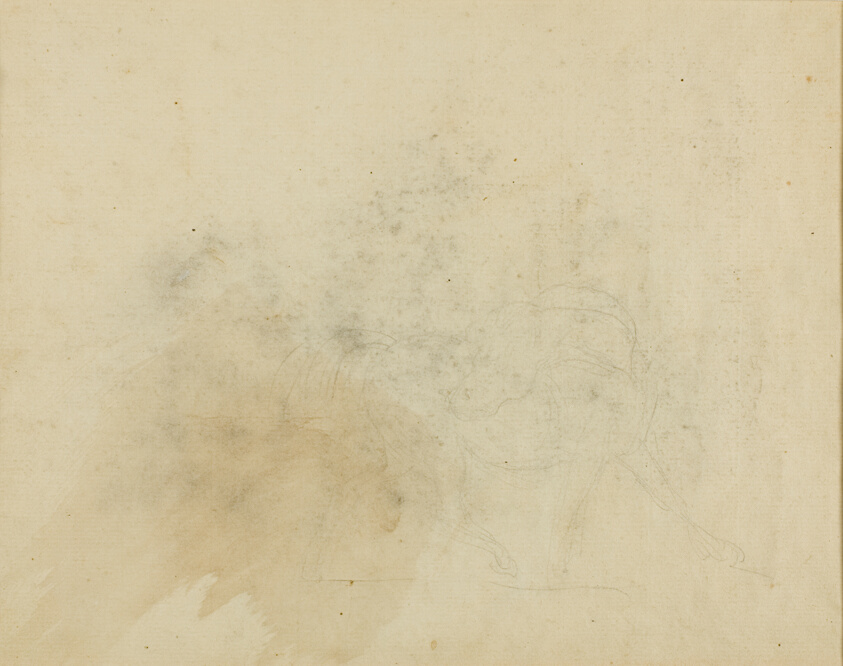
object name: Drawing and Watercolor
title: Horse Turning His Head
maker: Jean Louis André Théodore Géricault (French, 1791-1824)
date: 1818/19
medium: Graphite on cream laid paper, perimeter mounted on cream wove paper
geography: France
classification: drawings (visual works); prints and drawing